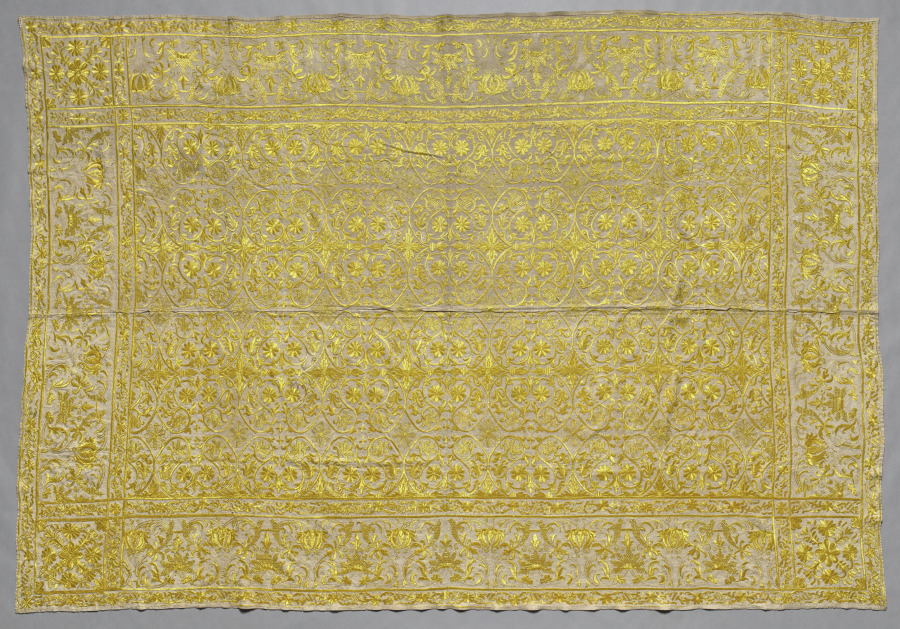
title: Embroidered Bedspread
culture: Portugal, 18th century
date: 18th century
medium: embroidery; silk on linen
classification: Embroidery